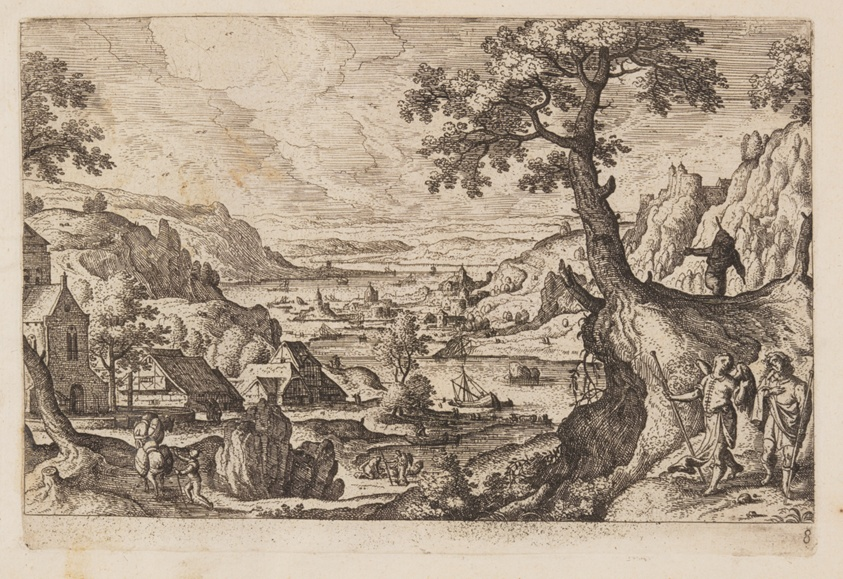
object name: Print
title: Plate 8, from Landscapes with Scenes from the Old and New Testament and Ovid’s Metamorphoses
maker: Hans Bol (Flemish, 1534–1593); published by Philip Galle (Flemish, 1537–1612)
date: 1574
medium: Etching on ivory laid paper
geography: Flanders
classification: print; paper; prints and drawing; etching